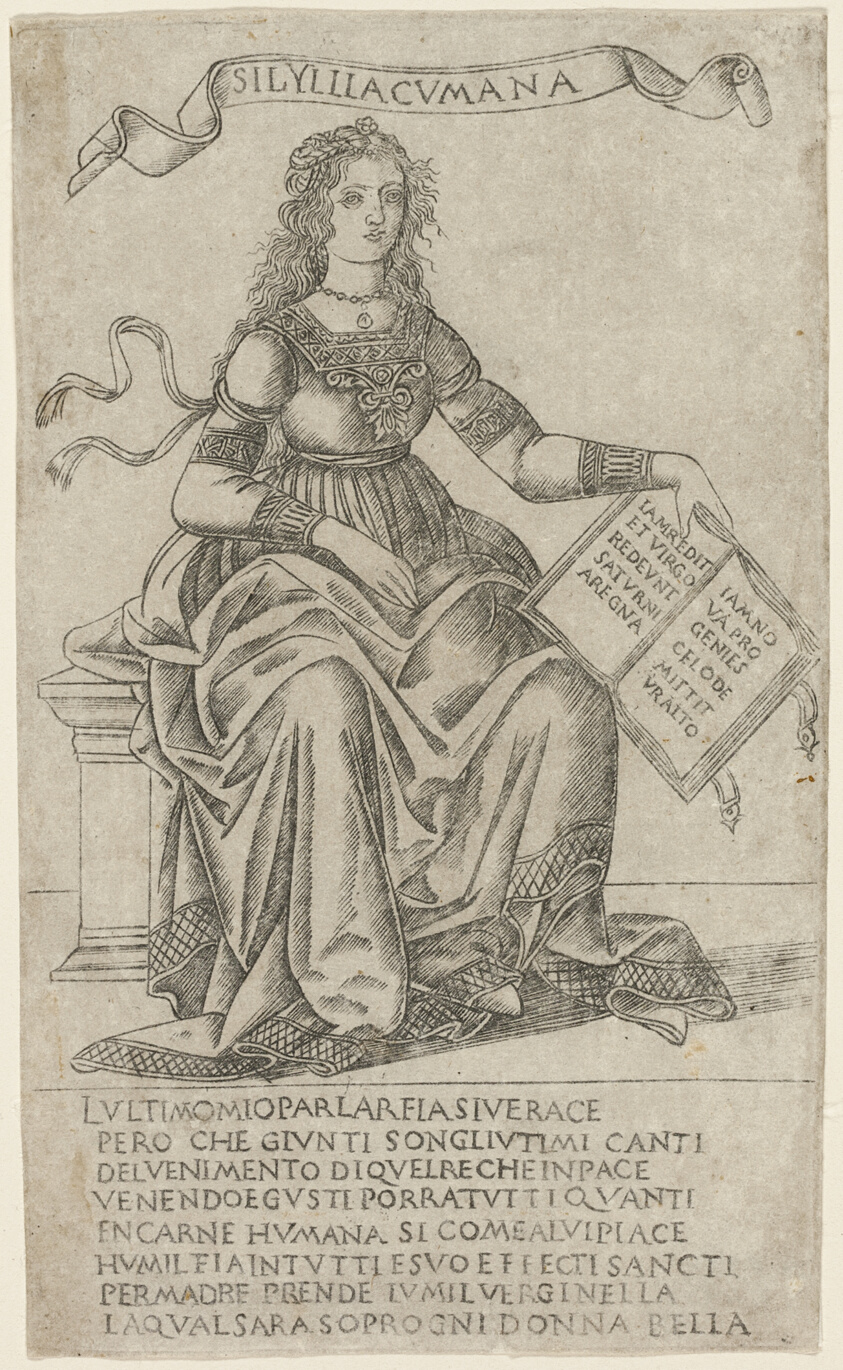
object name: Print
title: The Cumean Sibyl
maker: Attributed to Francesco Rosselli; Italian, 1448-before 1513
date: 1480/90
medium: Engraving on paper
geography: Italy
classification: engraving; print; prints and drawing